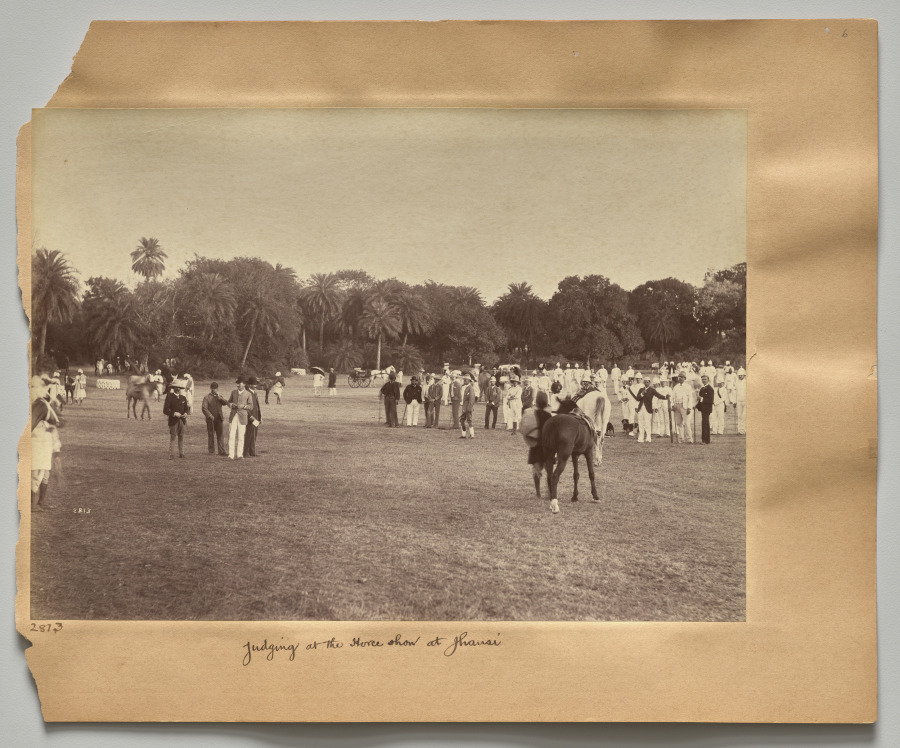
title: Judging at the Horseshow at Jhansi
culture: India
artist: Raja Deen Dayal (Indian, 1844–1905)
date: c. 1882–87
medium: albumen print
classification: Photograph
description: These photographs are part of an album, now disassembled, of around 105 photographs taken in India between 1885 and summer 1887 that provide glimpses into the lives of the British colonial elite and royal and upper-class Indians. The museum holds another group of 37 pictures from this album (2016.266), which was probably commissioned by a British civil servant visiting or working in India around 1888 as a personal souvenir of his experiences there.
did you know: Raja Deen Dayal is regarded now, and was considered during his lifetime, to be India’s most important 19th-century photographer.